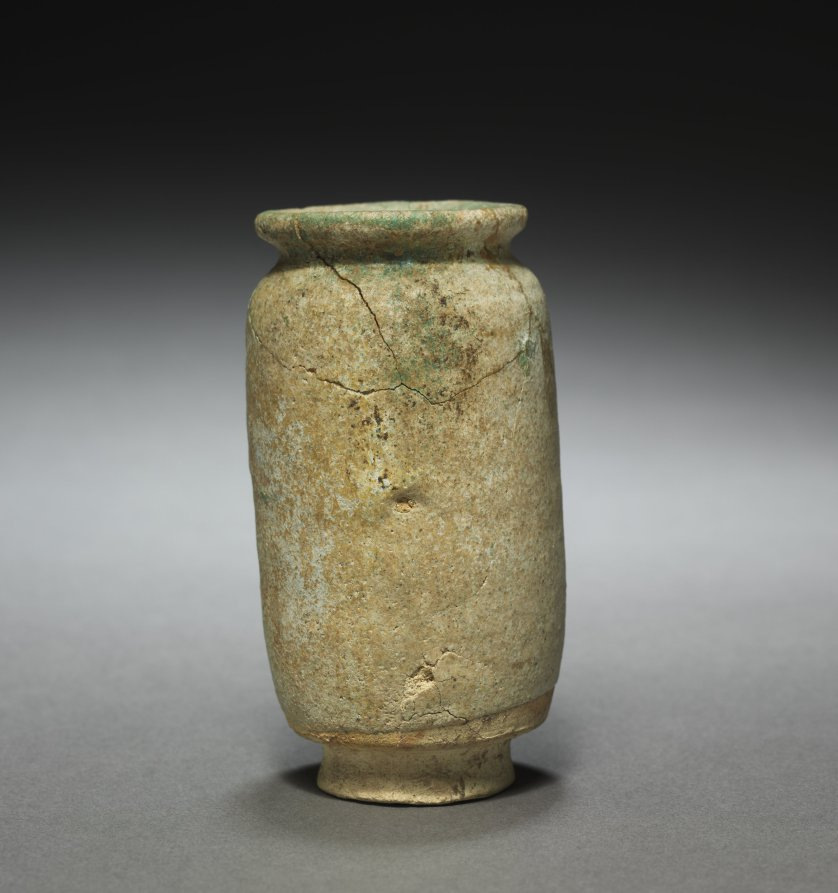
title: Bottle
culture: Parthian Empire (247 BCE–224 CE)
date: 1–200 CE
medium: earthenware with weathered glaze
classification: Ceramic